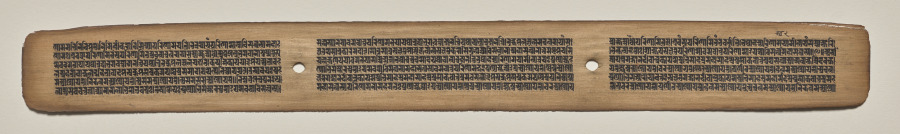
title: Text, Folio 55 (recto), from a Manuscript of the Perfection of Wisdom in Eight Thousand Lines (Ashtasahasrika Prajnaparamita-sutra)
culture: Eastern India, Bihar, Vikramashila Monastery. Painting: Nepal, Kathmandu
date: Sunday, September 14, 1119 (year 239 of the Newar Samvat in the month of Ashvina)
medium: gum tempera and ink on palm leaves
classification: Painting